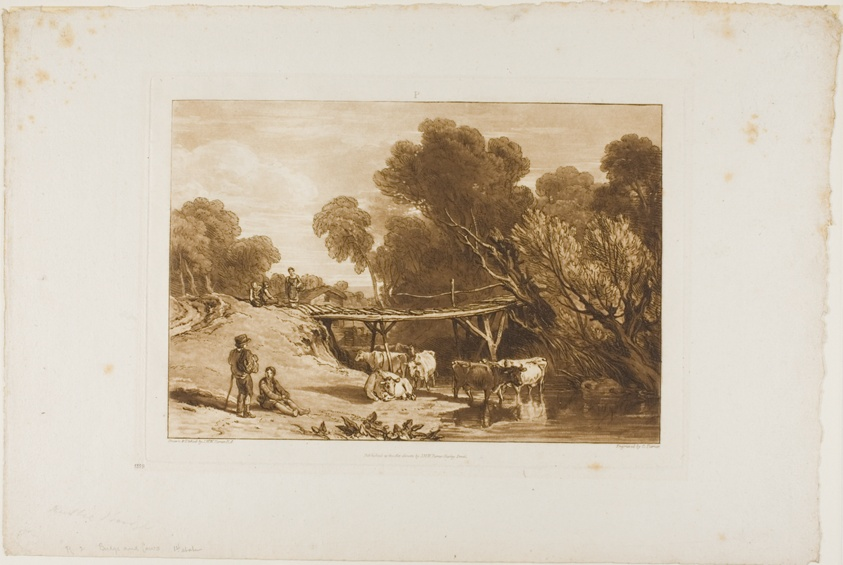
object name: Print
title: Bridge and Cows, plate 2 from Liber Studiorum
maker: Joseph Mallord William Turner (English, 1775-1851); Engraved by Charles Turner (English, 1773-1857)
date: published June 11, 1807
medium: Etching and engraving in brown on ivory paper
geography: England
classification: etching; print; prints and drawing